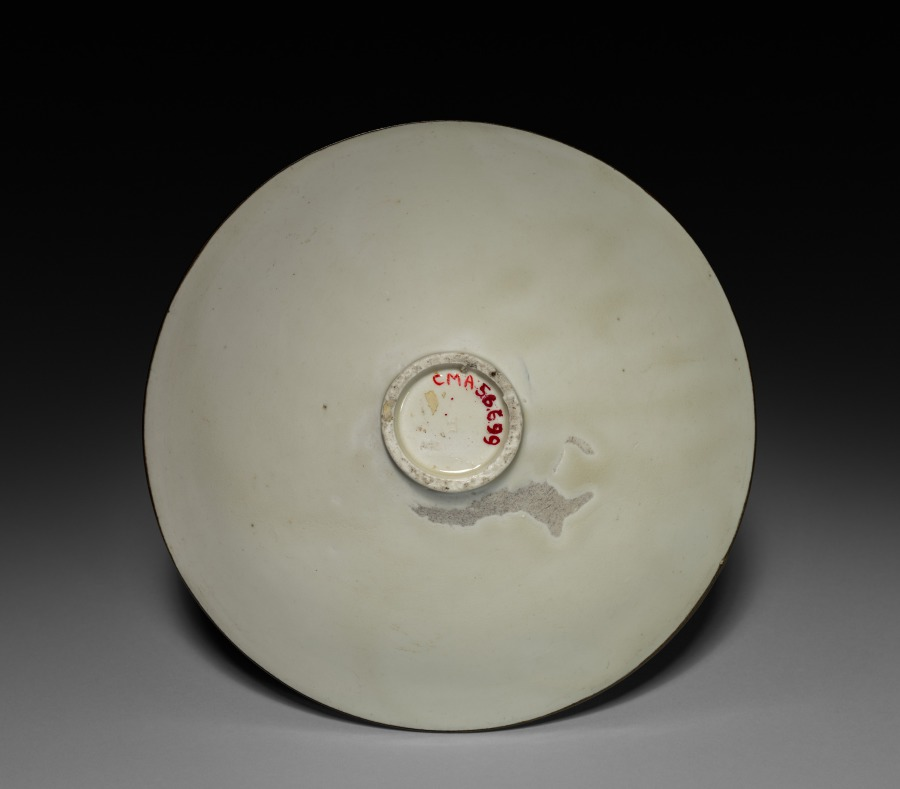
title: Bowl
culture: China, Hebei province, Chuyang District, Jin dynasty (1115-1234)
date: 12th Century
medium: White porcelain, Ding ware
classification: Ceramic